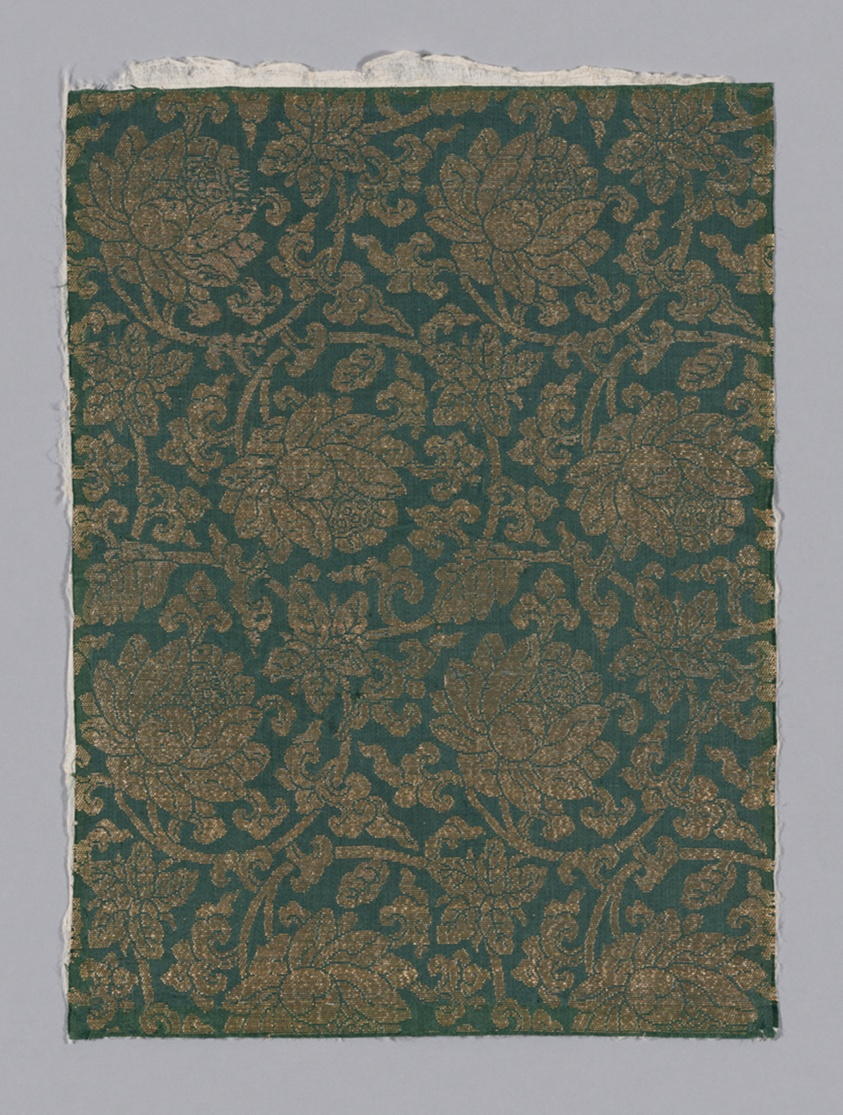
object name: Textile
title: Fragment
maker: Japan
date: 18th century, late Edo period (1789–1868)/ Meiji period (1868–1912)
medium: Plain compound twill, silk and gilt paper; 4 strips to m.m.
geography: Japan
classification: textile; weaving